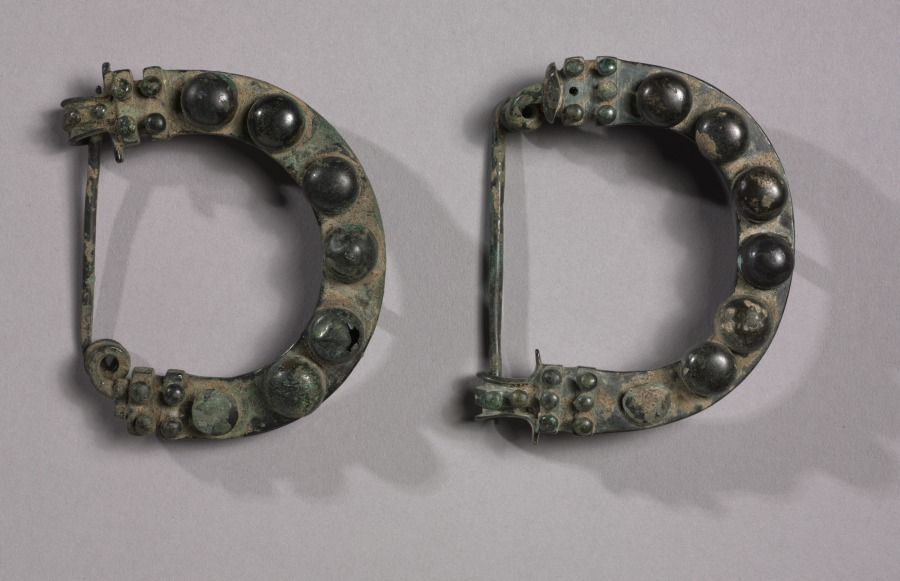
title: Pair of Arched Fibulae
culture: Anatolia, Phrygia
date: 725–675 BCE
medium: bronze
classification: Metalwork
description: Although not Greek, the matched pair of bronze Phrygian fibulae (brooches) may well be from the west coast of Asia Minor, an area settled by Greek colonists. Greeks and Phrygians enjoyed close relations in the late 8th to early 7th century BC.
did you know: A fibula is an ancient safety pin.